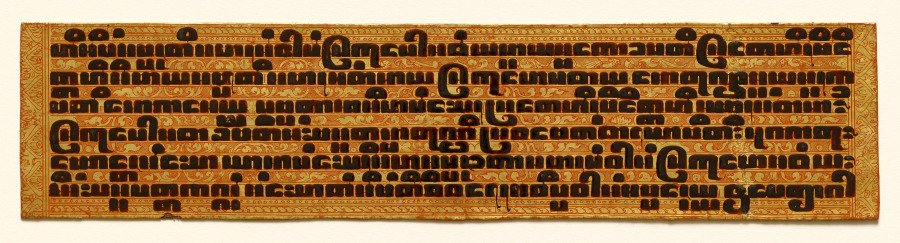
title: Text, folio 12 (recto) from a Kammavacha: Buddhist ordination text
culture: Myanmar (Burma)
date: 1800s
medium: Leaf: lacquer and gilding on cloth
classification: Manuscript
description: In premodern Burma, lay people commissioned lavishly ornamented manuscripts for ceremonial occasions, when officiants would read aloud from the text. Written in black lacquer, the text is in the language of Pali written in a Burmese script. It contains ordination rites and procedures for monastic ceremonies. The second to last page is covered with intricately drawn, winged celestial beings (nats) in gestures of praise. They fly amid intertwining vegetation—denoting bounty—that grows from serpentine forms that refer to rain clouds. Lionlike forms inhabit the space with them. The top and bottom covers are equally ornamented with jeweled floral patterning.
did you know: The Pali text of this manuscript is written in Burmese square script, which is also known as "tamarind seed script."